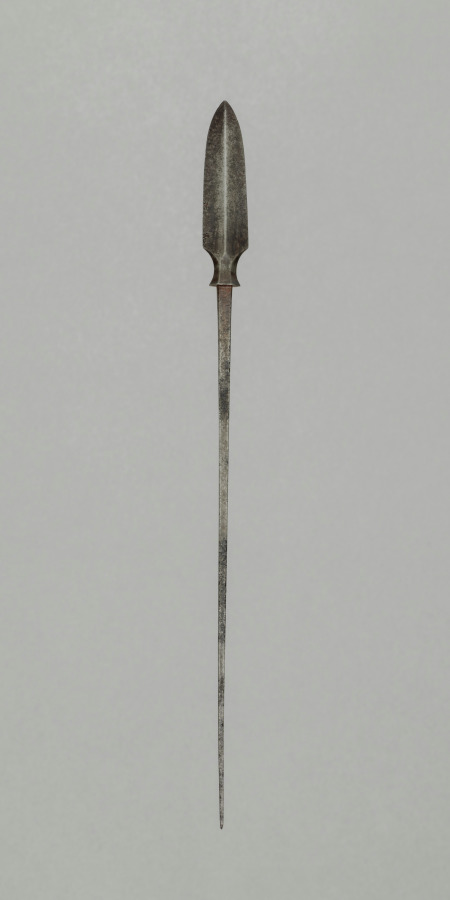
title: Arrow Point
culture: Japan, Edo period (1615–1868)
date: 1700s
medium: steel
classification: Arms and Armor